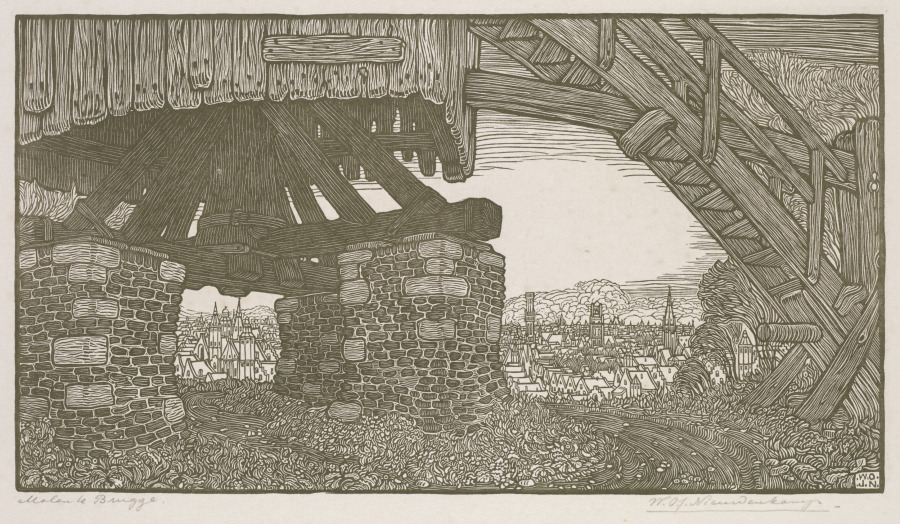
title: Mill at Bruges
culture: Netherlands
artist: Wynand Otto Jan Nieuwenkamp (Dutch, 1874–1950)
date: c. 1905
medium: woodcut, printed in dark green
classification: Print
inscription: Lower left corner, in graphite:Molen te Brugge; lower right: W.O.J. Nieuwenkamp